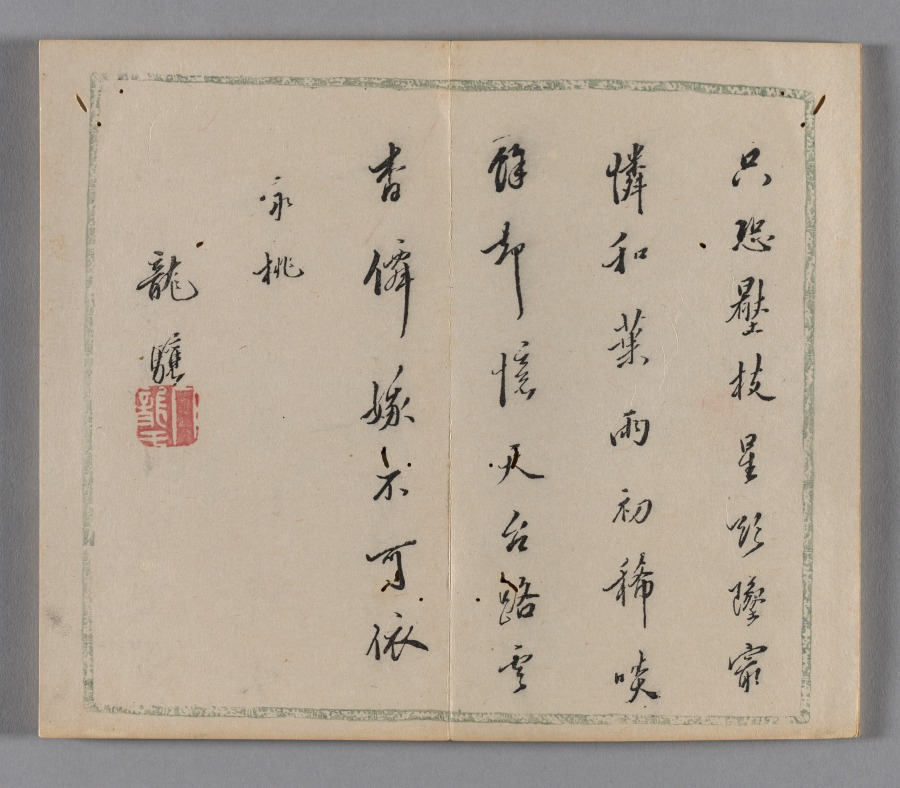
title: Ten Bamboo Studio Painting and Calligraphy Handbook (Shizhuzhai shuhua pu): Round Fans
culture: China, Qing dynasty (1644-1911)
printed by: Hu Zhengyan (Chinese, c. 1584–1674)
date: 1633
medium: Woodblock-printed book; ink and colors on paper; first edition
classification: Print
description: Color printing reached a level of perfection in the early 1600s, as seen in this Ten Bamboo Studio Collection of Calligraphy and Painting and the Mustard Seed Garden Manual of Painting (printed 1679 and 1701). The painterly quality, precision in registering (aligning) the woodblocks, and harmonious colors made them the most successful color print editions in Chinese history. Both editions were printed and compiled in Nanjing, spread nationwide, and had a great impact on the arts in Japan and Korea.